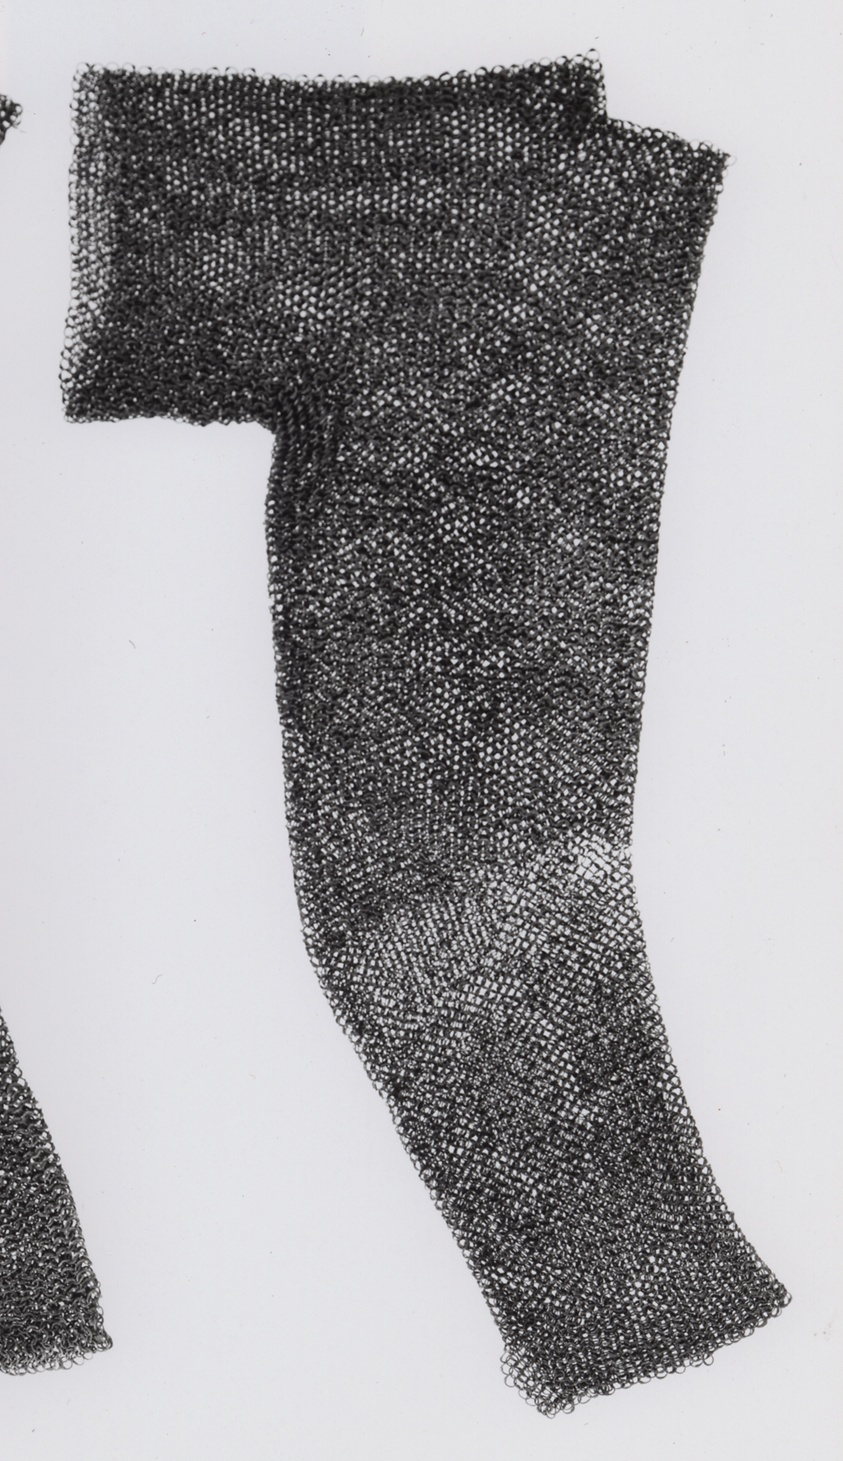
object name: Armor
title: Pair of Sleeves of Mail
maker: German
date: mid–16th century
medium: Steel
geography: Germany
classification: suit-element; armor; arms and armor